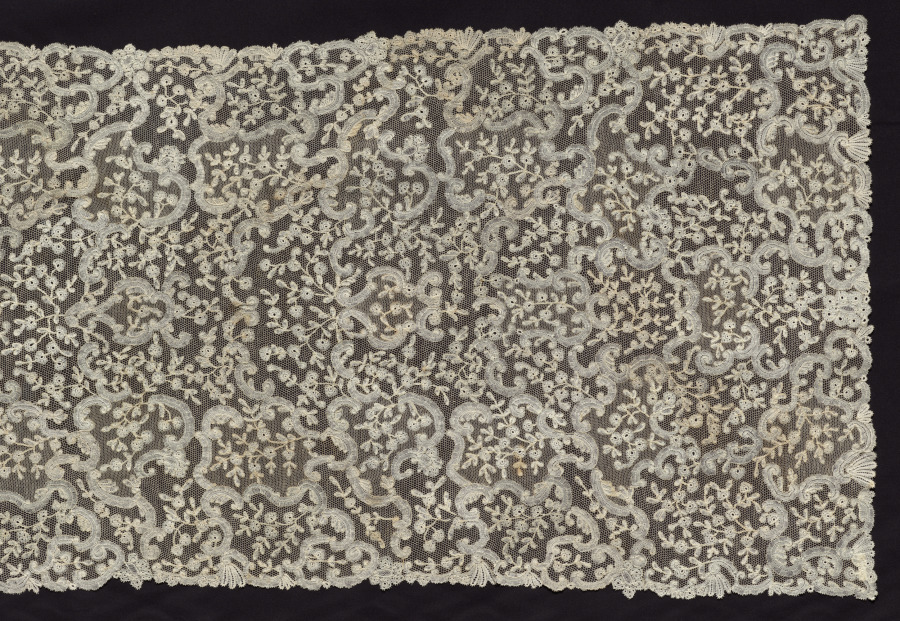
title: Lace Panel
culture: Probably Belgium, Brussels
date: 1800s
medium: linen: Duchesse(?) bobbin lace with plaited ground joining motifs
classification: Lace